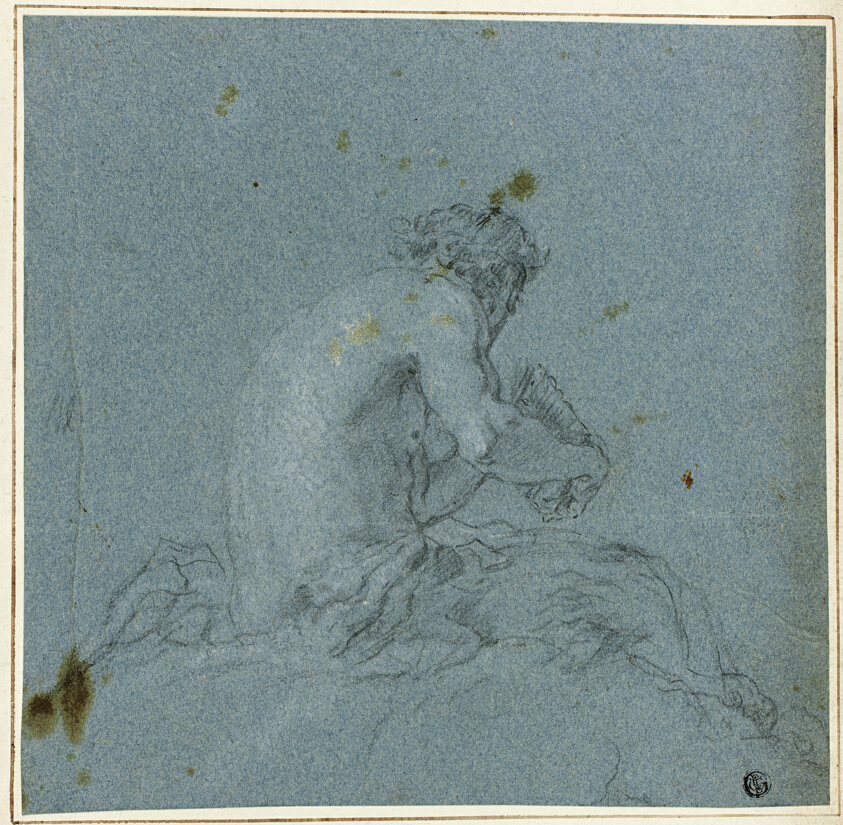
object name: Drawing and Watercolor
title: A Satyr Playing His Pipes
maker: Possibly Giovanni Domenico Tiepolo; Italian, 1727-1804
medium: Charcoal and black chalk, heightened with traces of white chalk, on blue laid paper, laid down on cream laid paper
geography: Italy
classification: charcoal; paper; chalk; drawings (visual works); prints and drawing